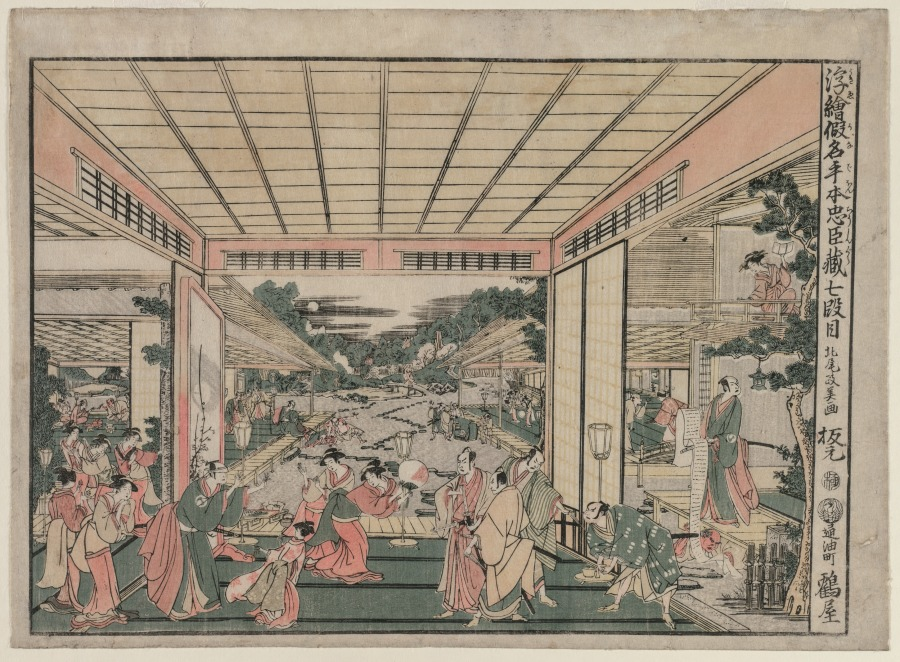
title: Chushingura: Act VII (from the series Perspective Pictures for The Treasure House of Loyalty)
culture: Japan, Edo period (1615–1868)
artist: Kitao Masayoshi (Japanese, 1761–1824)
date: c. 1790s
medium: color woodblock print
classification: Print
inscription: Signature: Kitao Masayoshi ga Publisher: Tsuruya Kiemon (hammoto Toriaburacho Tsuruya, emblem) Censorship Seal: kiwame